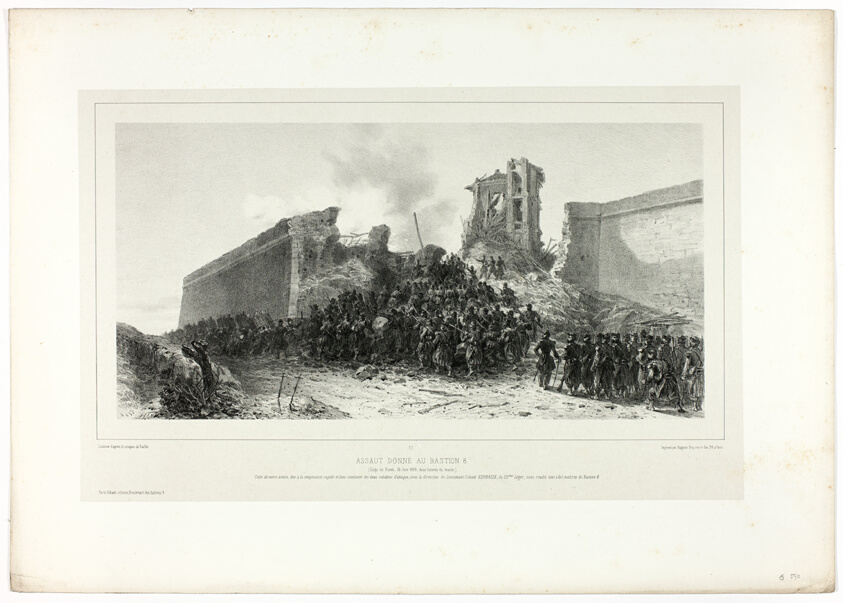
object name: Print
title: Assault of bastion no.8, from Souvenirs d’Italie: Expédition de Rome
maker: François Hippolyte Lalaisse (French, 1810-1884); after Denis Auguste Marie Raffet (French, 1804-1860); printed by Auguste Bry (French, 19th century); published by Chez Frères Gihaut (French, 19th century)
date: published December, 1860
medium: Lithograph in black on warm ivory wove chine laid down on off-white wove paper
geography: France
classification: lithograph; print; prints and drawing